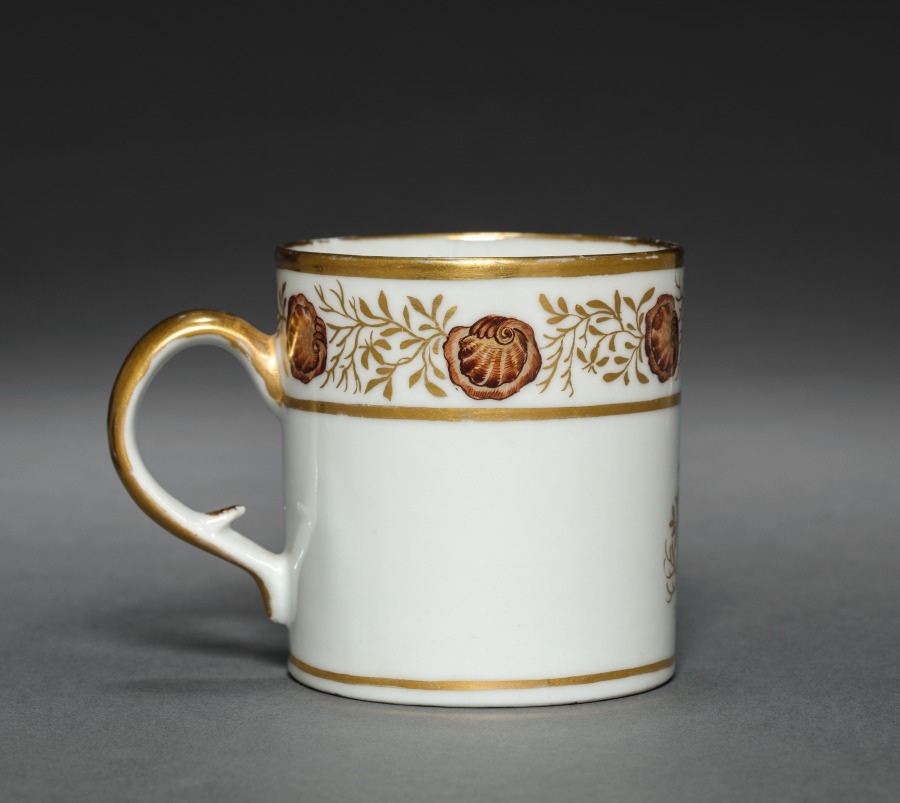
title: Cup from Oliver Wolcott, Jr. Tea Service (1 of 6)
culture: Chinese Export porcelain, late 18th-early 19th century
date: 1785–1805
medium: porcelain, sepia enamel, gold leaf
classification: Ceramic